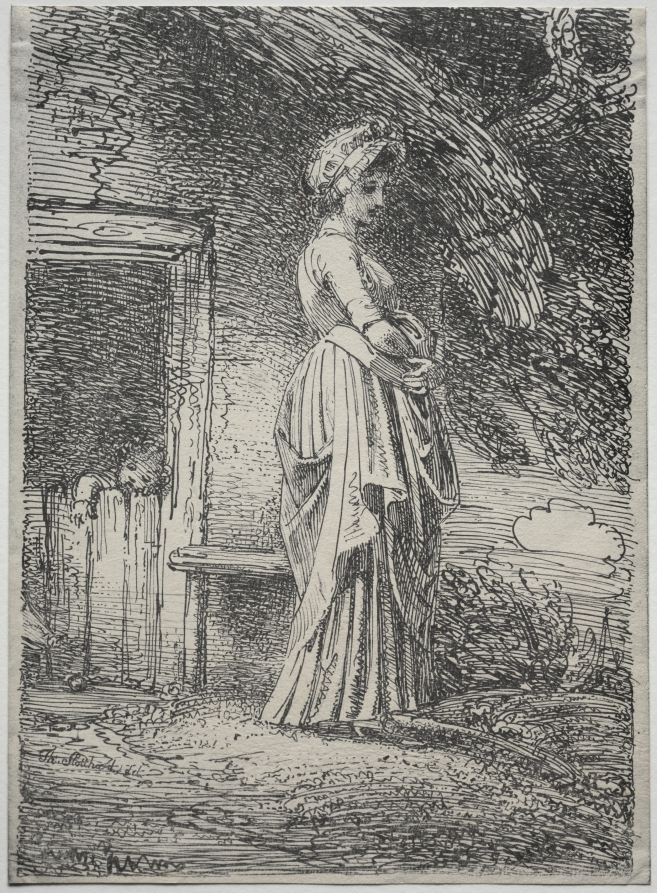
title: Specimens of Polyautography: The Lost Apple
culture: England, early 19th Century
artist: Thomas Stothard (British, 1755–1834)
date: 1803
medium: lithograph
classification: Print